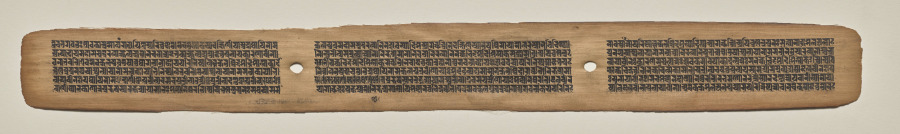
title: Text, folio 182 (recto), from a Manuscript of the Perfection of Wisdom in Eight Thousand Lines (Ashtasahasrika Prajnaparamita-sutra)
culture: Eastern India, Bihar, Vikramashila Monastery. Painting: Nepal, Kathmandu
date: Sunday, September 14, 1119 (year 239 of the Newar Samvat in the month of Ashvina)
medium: gum tempera and ink on palm leaves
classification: Painting